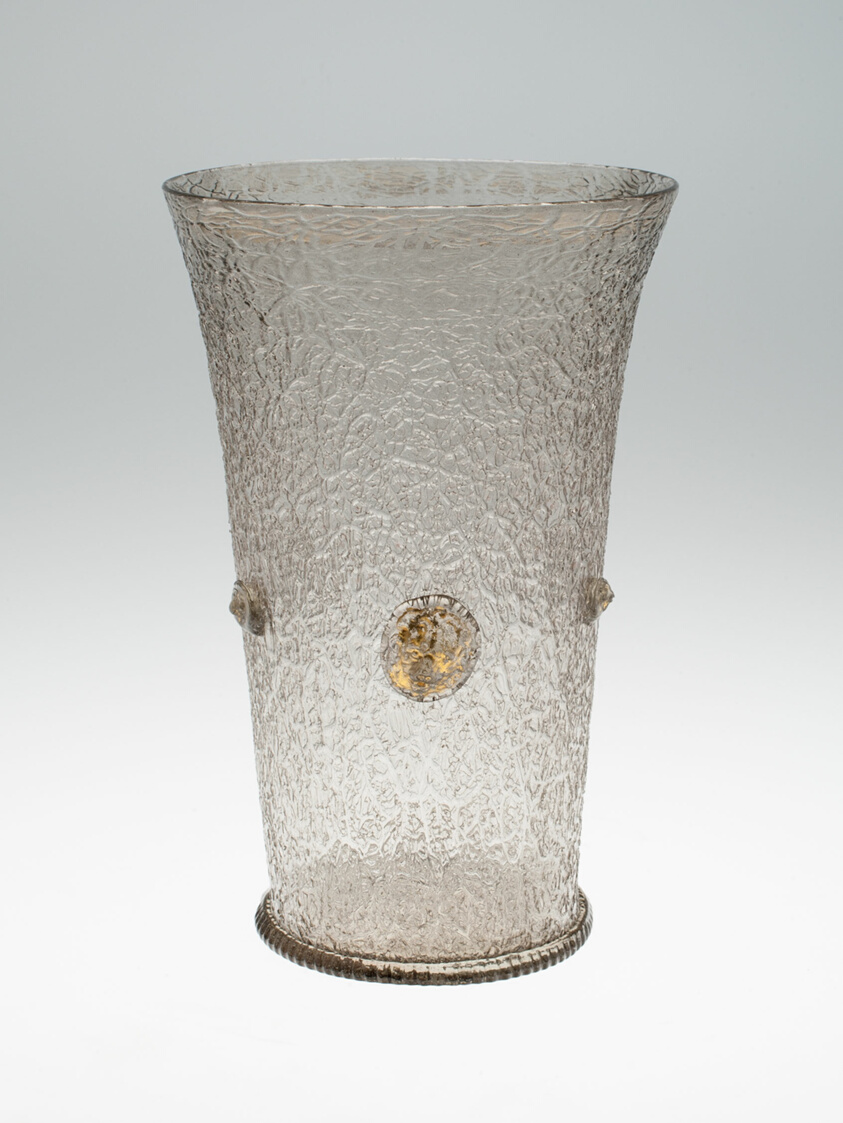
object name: Glass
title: Façon de Venise Beaker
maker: Flemish; Antwerp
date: 1580/1600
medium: Colorless glass with gilding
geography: Antwerp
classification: drinking vessel; glass; european decorative arts